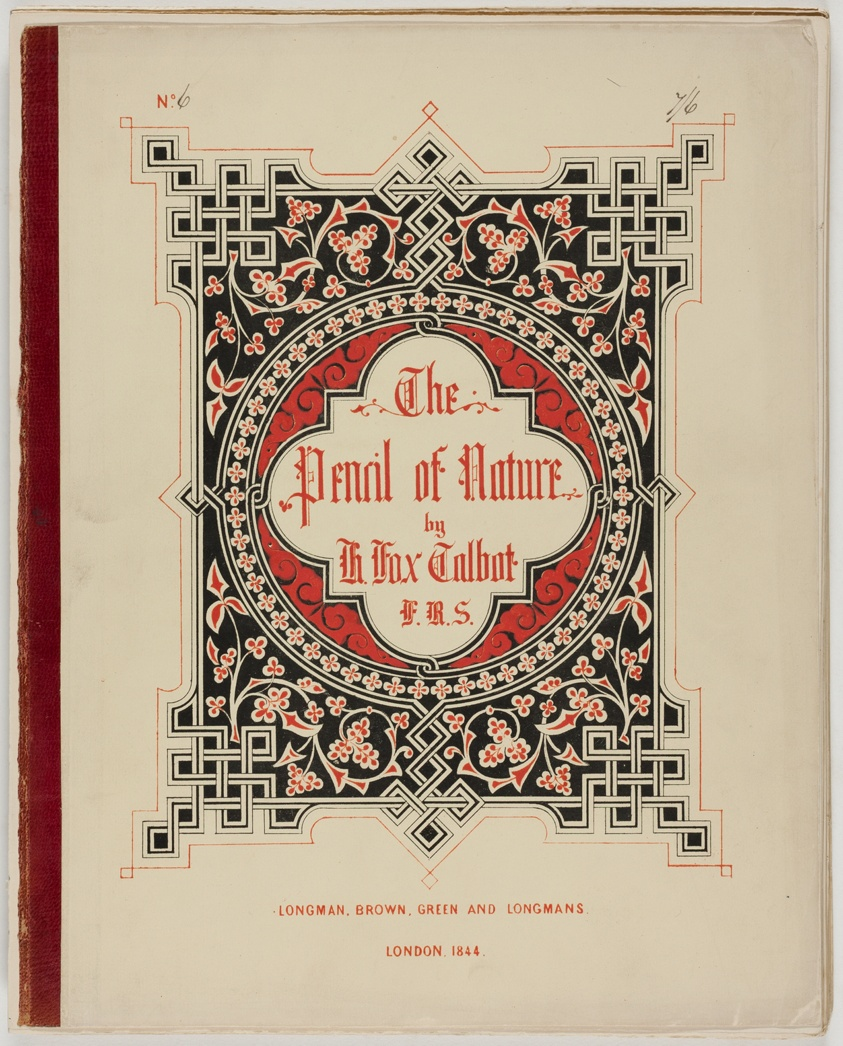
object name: Photograph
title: Cover and Text from "The Pencil of Nature," London, 1844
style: 19th century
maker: William Henry Fox Talbot (English, 1800–1877)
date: 1844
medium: Paper cover and unbound pages of text (approximately 12,000 words) without illustrations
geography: England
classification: ink on paper; printing process; photography; photograph